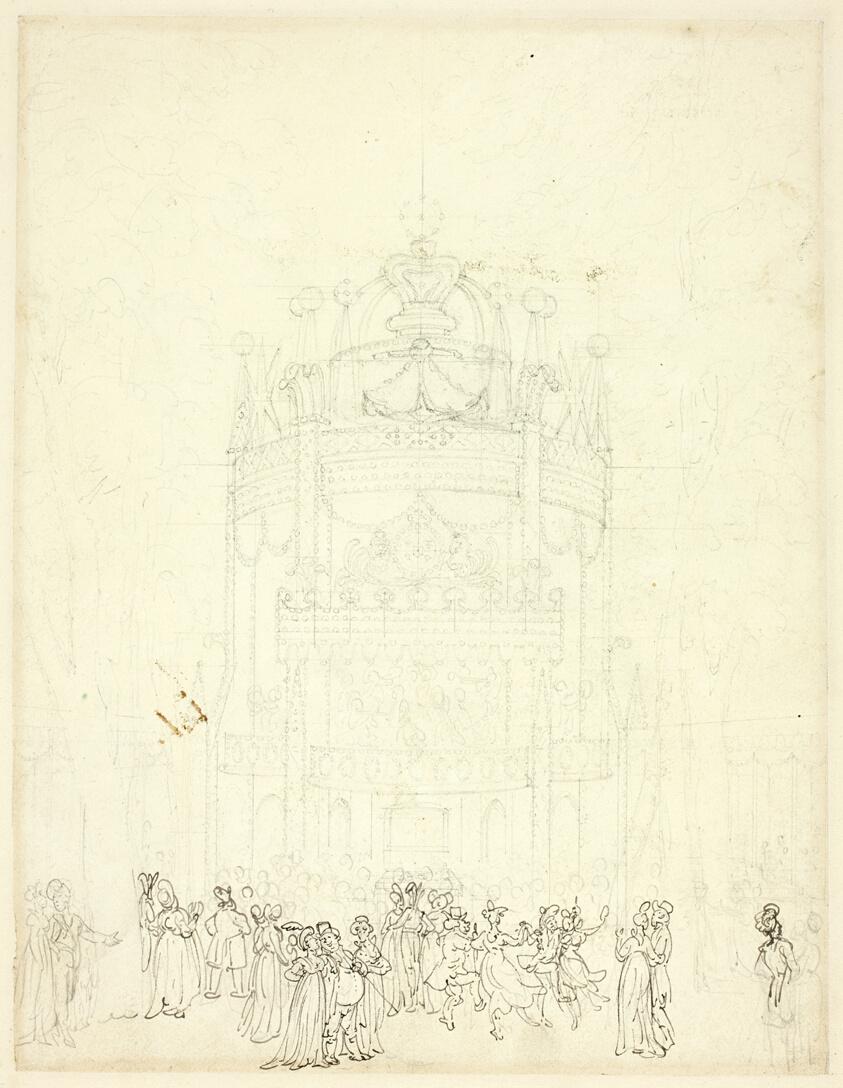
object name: Drawing and Watercolor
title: Study for Vauxhall Garden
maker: Augustus Charles Pugin (English, born France, 1762-1832); Thomas Rowlandson (English, 1756-1827)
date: c. 1809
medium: Pen and brown ink and graphite, on ivory wove paper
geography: England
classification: pen and ink drawings; graphite; drawings (visual works); prints and drawing